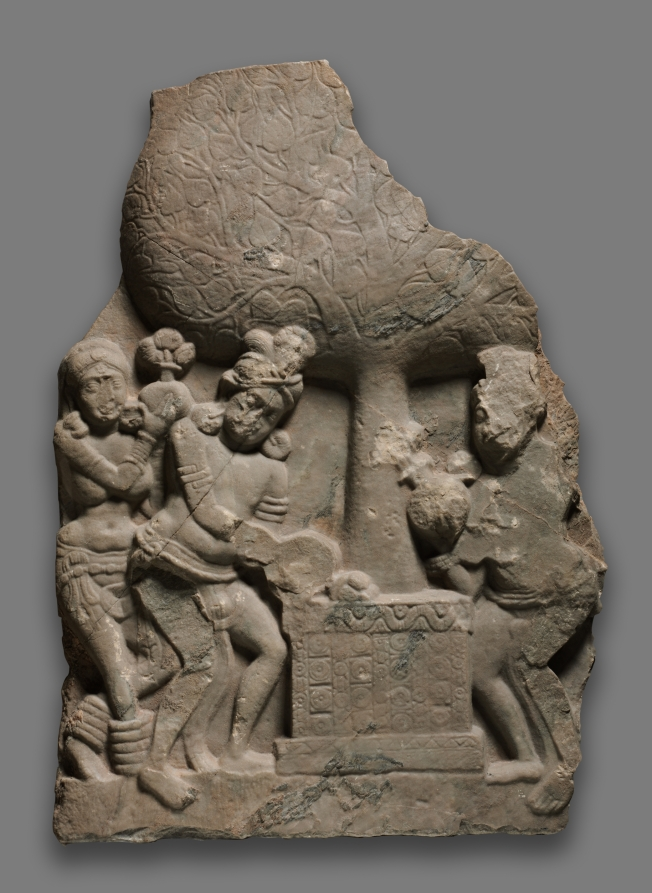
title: Worshippers at a sacred tree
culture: Southern India, Andhra Pradesh, possibly Chandavaram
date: about 50 BCE to 50 CE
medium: limestone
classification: Sculpture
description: The square railing surrounding the base of the trunk is the marker of a sacred tree. This tree has the distinctive heart-shaped leaves of the Bodhi tree (ficus religiosa), which is the type of tree under which the Buddha reached enlightenment. Each of the the worshippers holds a narrow-necked pot with lotus flowers emerging from the mouth. The lotus flowers are a symbol for water, so these figures are pouring offerings of pure water to the sacred tree.